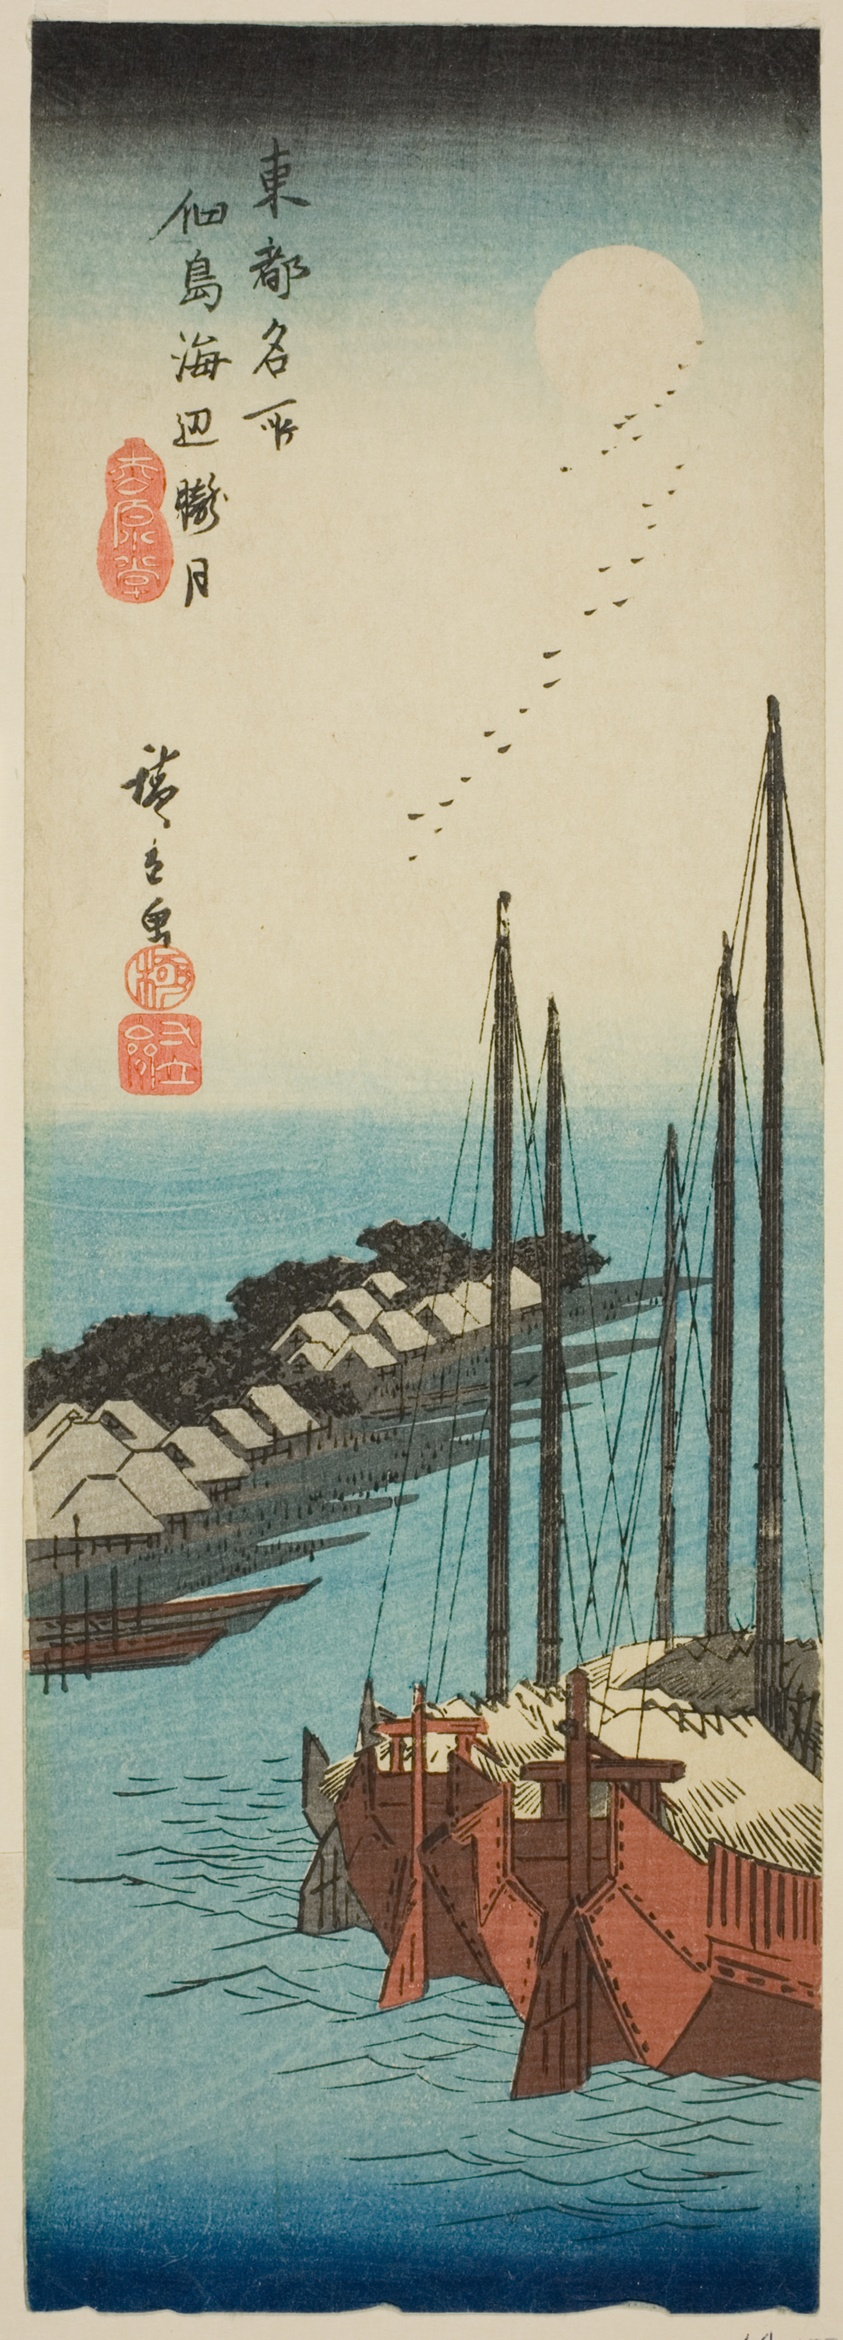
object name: Print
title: Misty Moonlight on the Shore at Tsukuda Island (Tsukudajima kaihen oborozuki), from the series "Famous Places in the Eastern Capital (Toto meisho)"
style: Japanese (culture or style)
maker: Utagawa Hiroshige 歌川 広重; Japanese, 1797-1858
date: c. 1835/38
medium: Color woodblock print; chutanzaku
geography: Japan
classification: woodblock print; print; asian art